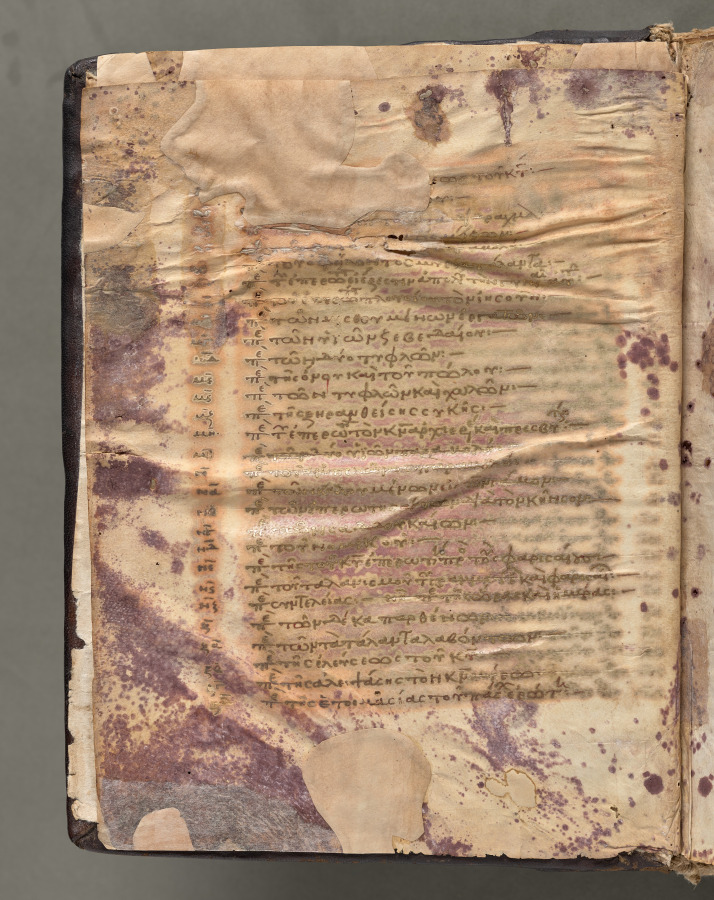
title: Text, folio 3 (verso), from a Gospel Book with Commentaries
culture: Byzantium, Constantinople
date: c. 1000–1100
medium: ink, tempera, and gold on vellum; leather binding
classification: Bound Volume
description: Each of the four gospels in this book opens on a page with brilliantly illuminated borders depicting the author of the text as well as birds-principally peacocks, symbols of the immortality of the soul-and fountains, representing the fountain of life and the salvation of the soul. This volume consists of 428 leaves with texts in Greek. Its level of sophistication suggests that it was probably written and decorated in a monastery in Constantinople.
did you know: Gospel Books were carried in procession through Byzantine churches.